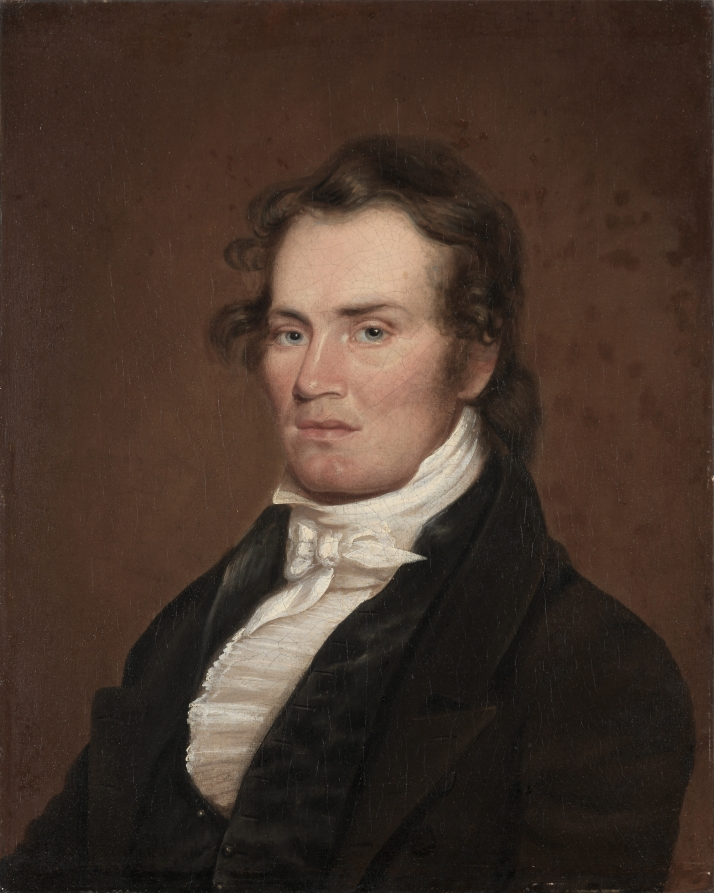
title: James G. McKinney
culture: America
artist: Matthew Harris Jouett (American, 1787/88–1827)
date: 19th century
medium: oil on canvas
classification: Painting